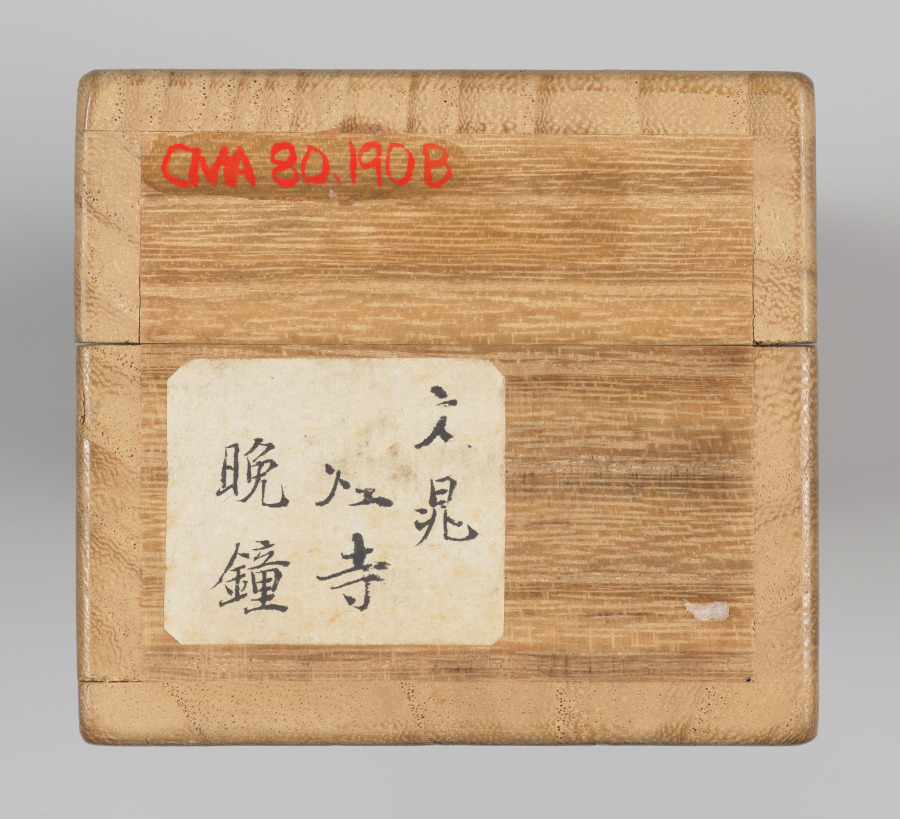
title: Returning Sails off a Distant Shores, from Eight Views of Xiao-Xiang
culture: Japan, Edo period (1615–1868)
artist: Tani Bunchō (Japanese, 1763–1841)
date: 1788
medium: album leaf remounted as a hanging scroll; ink and color on paper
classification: Painting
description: This painting was part of a set of album leaves representing the Eight Views of Xiao-Xiang, a theme originating in Chinese poetry and painting that spread to both Korea and Japan. Southern China’s Xiao-Xiang area, where the mist-covered banks of the Xiang River created a complex landscape shifting like the moods and minds of people, captured the imaginations of generations of painters and calligraphers. Inscriptions on these works suggest that they were possibly ordered by newly prominent Japanese Confucian scholars.